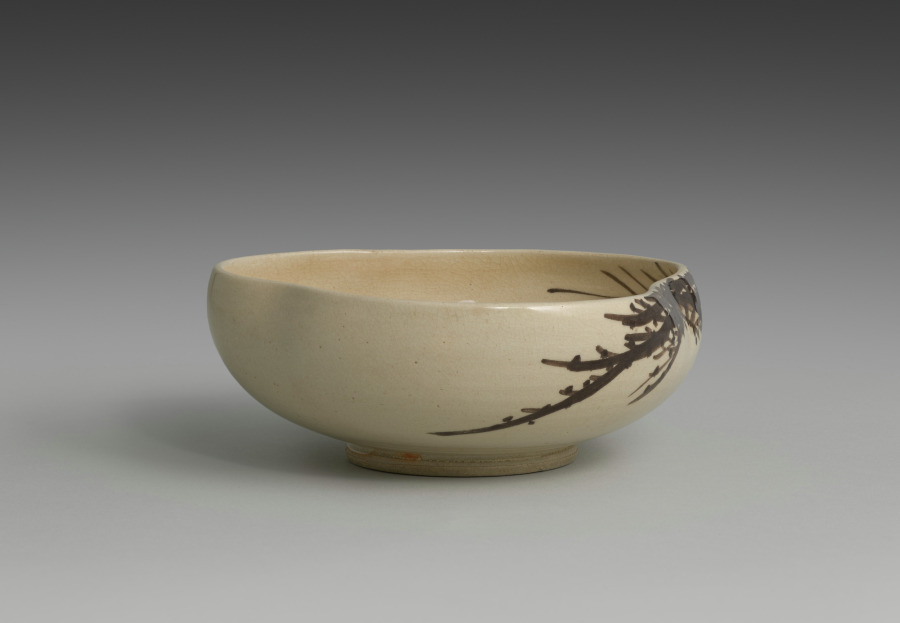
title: Pine-shaped Dish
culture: Japan, Meiji period (1868–1912)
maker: Seifū Yohei III (Japanese, 1851–1914)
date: 1893–1914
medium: Stoneware with underglaze iron oxide and crackled glaze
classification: Ceramic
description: The clever design on this stoneware Awata-style dish makes use of the interior and exterior surfaces to present a close-up view of pine needles on the branch painted in underglaze iron oxide. The branch is shown on the outside of one side of the dish, while the needles fan out across the inside. The entire dish, when seen from above, reveals a shape resembling the mushroom cap–like motif appearing in textile designs and in classical Japanese paintings called Yamato-e to represent pine trees.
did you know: Awata ware, named for the area of Kyoto where it was historically produced, is considered a subset of Kyoto ware. It is characterized by a very light brown body with a transparent crackled glaze.